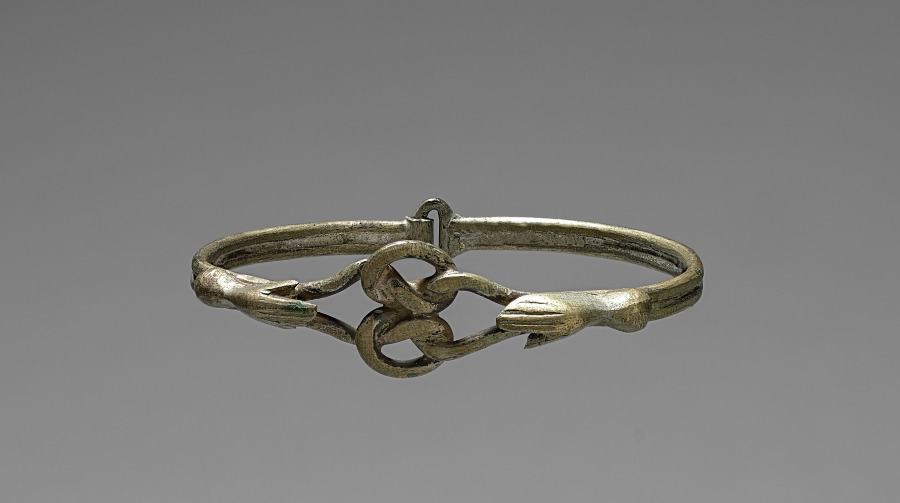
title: Wristlet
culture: Burma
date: 1800s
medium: gold and rubies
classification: Jewelry